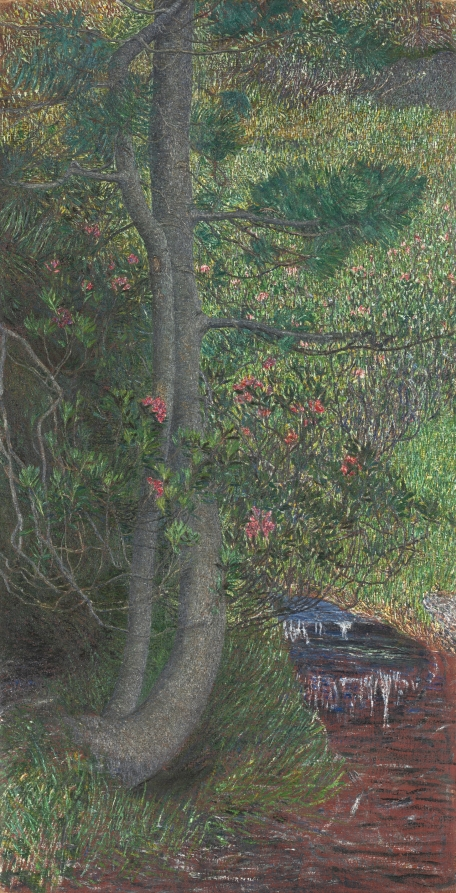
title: Pine Tree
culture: Italy, 19th century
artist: Giovanni Segantini (Italian, 1858–1899)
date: c. 1897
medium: oil on fabric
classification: Painting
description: Segantini painted this view of a pine tree in the Swiss Alps with his distinctive combination of brilliant colors applied in small, broken strokes. Rather than a direct transcription of nature, the extreme close-up view and the flat, decorative space are designed to arouse an emotional response. Finding spiritual consolation in the lush forests and clear light around his home in the Alps, Segantini wrote: “I am now working passionately to wrest the secret of Nature’s spirit from her. Nature utters the eternal word to the artist: love, love; and the earth sings life in spring, and the soul of things reawakens.”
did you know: The bottom right portion of this painting was left unfinished; the earth-red ground layer is still visible.